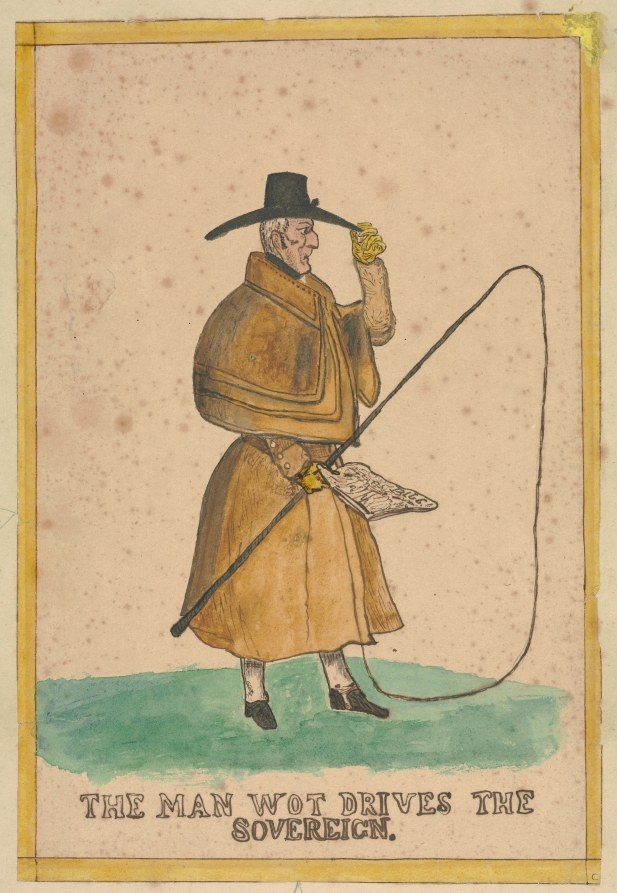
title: The Man Wot Drives the Sovereign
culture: England, 19th century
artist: Richard Dighton (British, 1795–1880)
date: c. 1815–80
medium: pen and brown ink with brown wash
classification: Drawing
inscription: Titled in brown ink, bottom recto